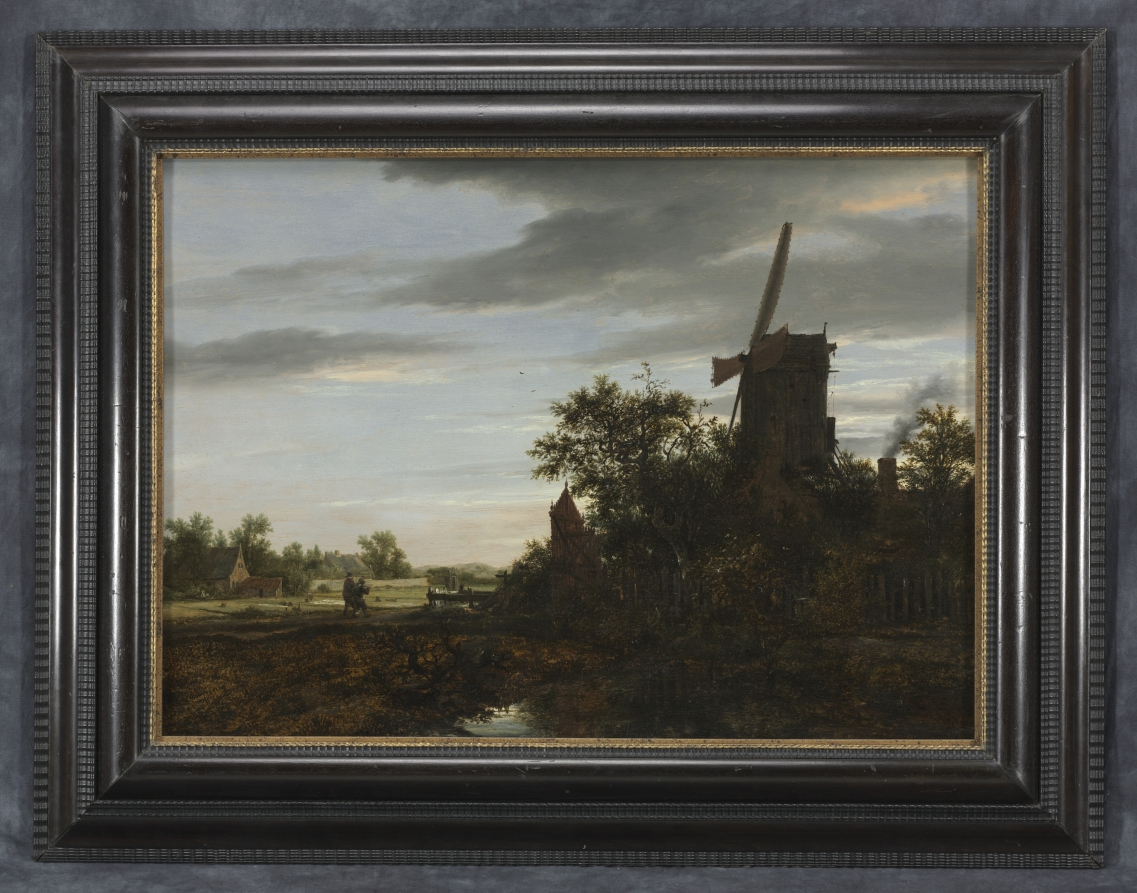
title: Landscape with a Windmill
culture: Netherlands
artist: Jacob van Ruisdael (Dutch, 1628/29–1682)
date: 1646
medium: oil on wood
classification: Painting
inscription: Signed lower right: "JvR 1646 [JvR in monogram]"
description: Even this early work by Jacob van Ruisdael—painted while he was still a teenager—shows his unique approach to landscape that made the simplest motifs seem grand and heroic. Dark forms are massed in the foreground, creating a stark contrast to the expansive, sunlit plain at left.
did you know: Look closely at the field across from the windmill: white linens are naturally bleached in the sun, a process that would have taken several months.